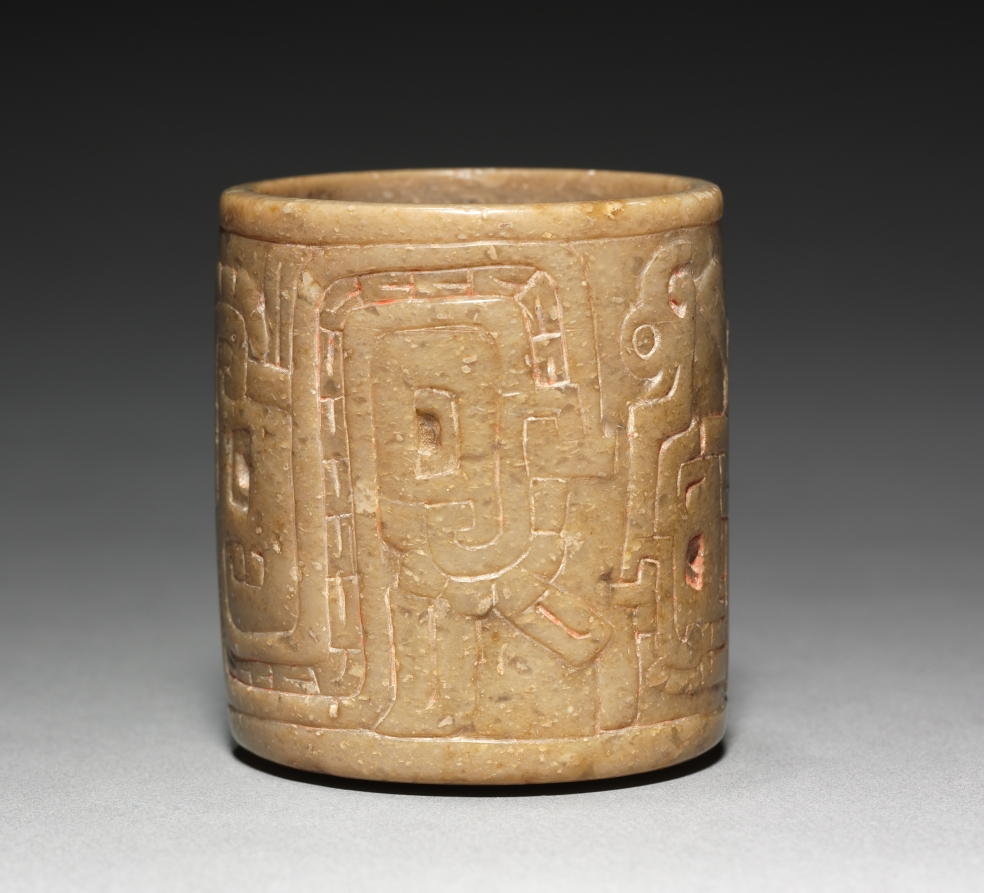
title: Cup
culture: Peru, North Coast, Cupisnique style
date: c. 900–600 BCE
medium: steatite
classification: Stone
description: While Chavín held sway in the highlands, coastal artists produced many objects in non-Chavín styles. Such is the case with these small, finely carved, stone containers, which were part of north coast ritual paraphernalia, though their specific use is unclear. Both bear complex designs based on fanged heads in profile that lack lower jaws.